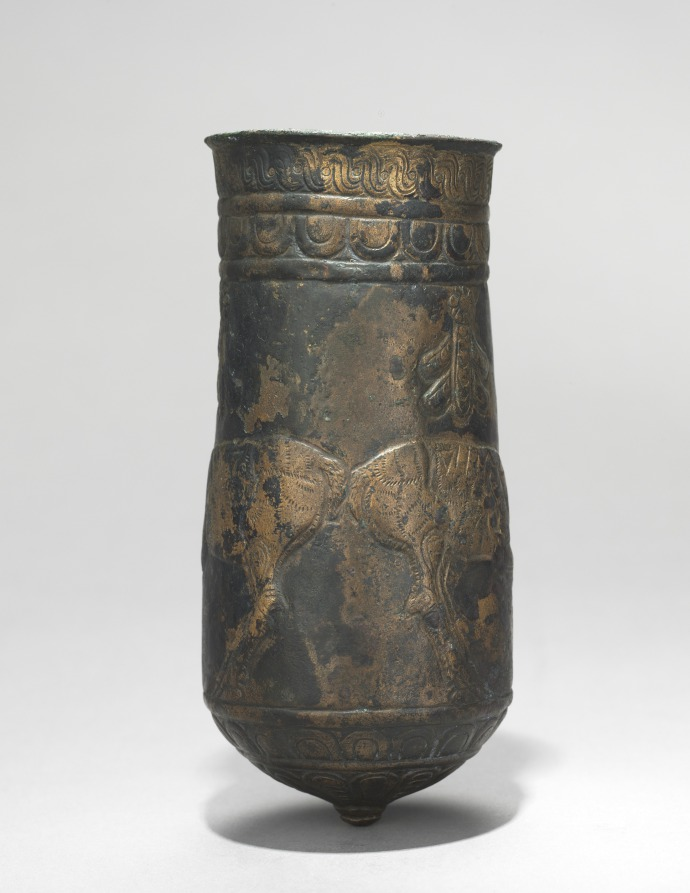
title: Button-Based Situla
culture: Iran, Luristan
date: 900–700 BCE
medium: bronze, repoussé, punched, incised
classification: Metalwork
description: The metalworkers of Luristan provided the Assyrian empire with elaborate bronze ornaments and vessels. These two situla are decorated symmetrically---one with ibexes drinking from an overflowing water jar; the other, with sphinxes.